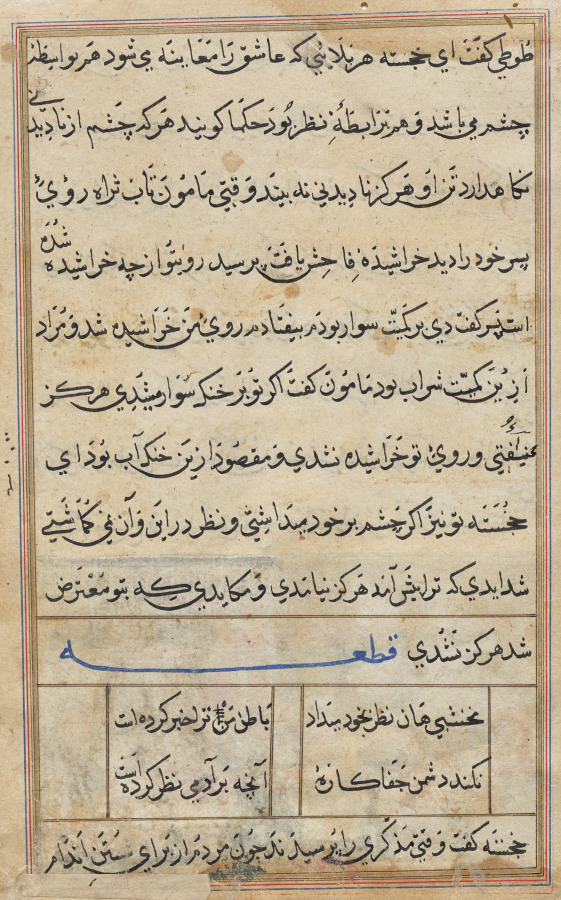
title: Page from Tales of a Parrot (Tuti-nama): text page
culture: Mughal India, court of Akbar (reigned 1556–1605)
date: c. 1560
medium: gum tempera, ink, and gold on paper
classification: Painting